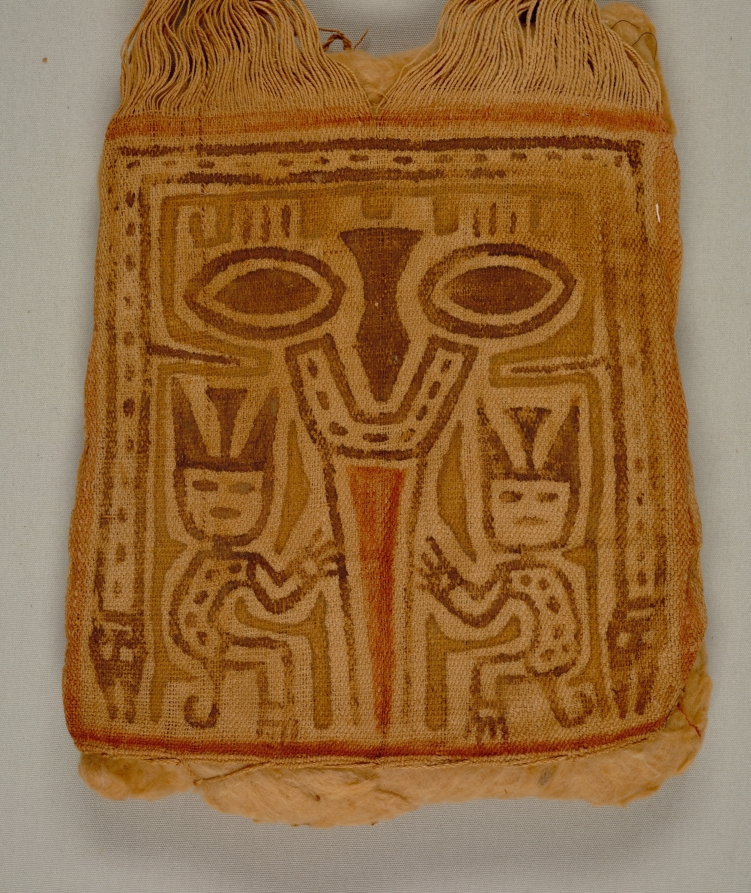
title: Mummy Bundle "Mask"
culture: Peru, South Coast, Ica Valley, Ocucaje site, Paracas style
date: 200–1 BCE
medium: cotton and pigment, plain weave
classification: Textile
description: The Paracas people buried their dead in pear-shaped mummy bundles, created by carefully wrapping the seated human body in layers of garments and other textiles. Sometimes a painted cloth was placed on the outer layer at the top of the bundle, as though it served as the bundle’s face, head, or “mask.” Some cloths were painted with masklike faces, although others—such as this example—feature complete figures, which may be mythological beings with supernatural appendages.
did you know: These masks fall into two categories, those with only a face and those with a full-bodied figure.